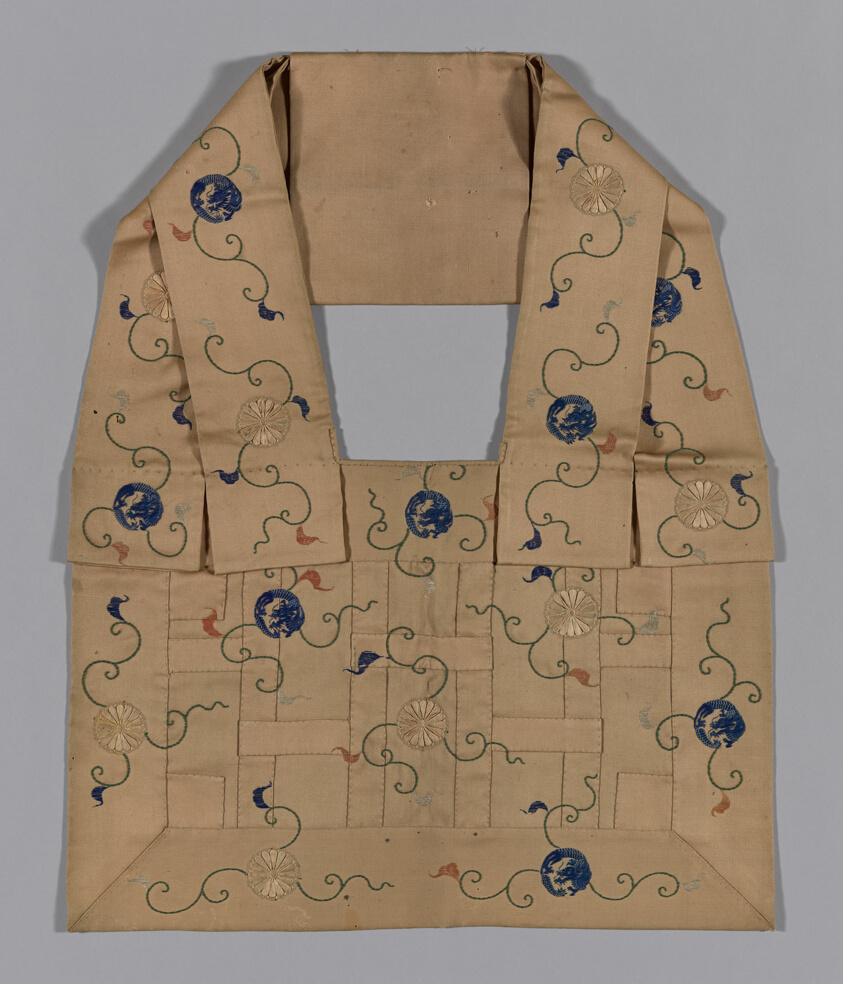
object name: Textile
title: Kesa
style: meiji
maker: Japan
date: Meiji period (1868–1912), 1870/1900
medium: Wool, warp-float faced 4:1 satin weave; embroidered with silk, in satin and paper-padded satin stiches; laidwork and couching; lined with silk, 4:1 satin damask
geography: Japan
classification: textile; liturgical - buddhist; needlework (visual works); weaving